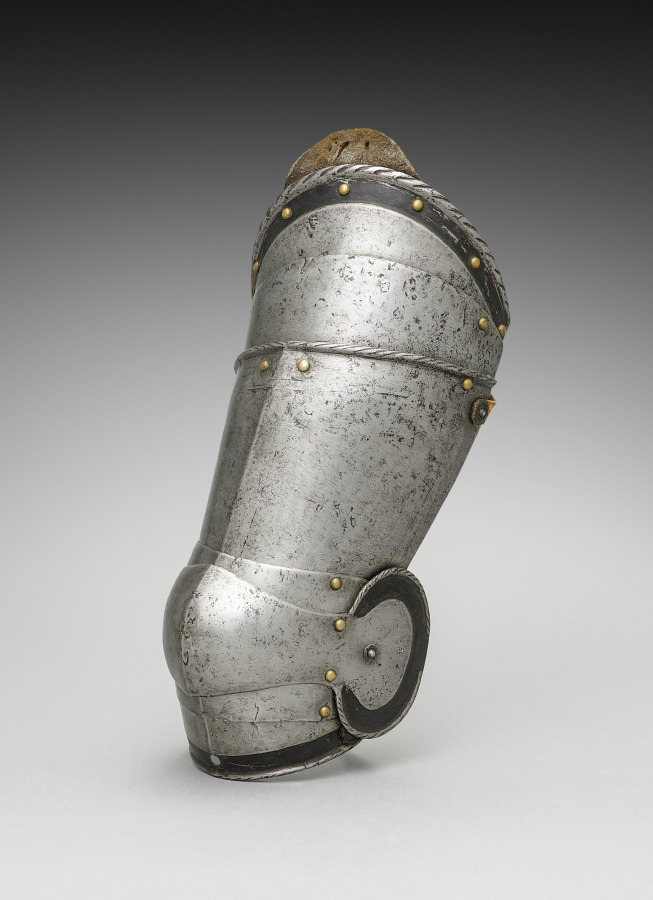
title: Left Cuisse with Poleyns (knee-cops)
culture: Germany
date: c.1550–1570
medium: iron, steel, leather and brass rivets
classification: Arms and Armor